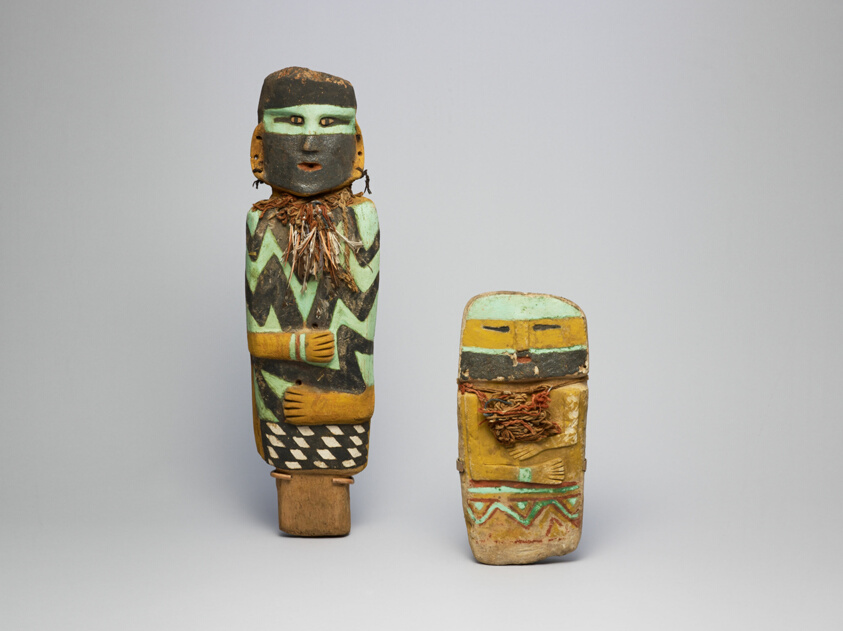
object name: Religious/Ritual Object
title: Ritual Cache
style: salado, mimbres, mogollon, americas, southwest, native american, native north american, Arts of the Americas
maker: Salado branch of the Mogollon; New Mexico, United States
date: 1300–1400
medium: Wood, stone, plant fibers, cotton, feathers, hide, and pigment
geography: New Mexico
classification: ceremonial object; ceramics; masks; ritual objects; art of the americas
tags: ceremonial objects, figures (representations), snakes, ritual objects, mountain lions, indigenous, nature, altar, offering, feathers, corn, lightning, fertility, supernatural, basketry, hunting